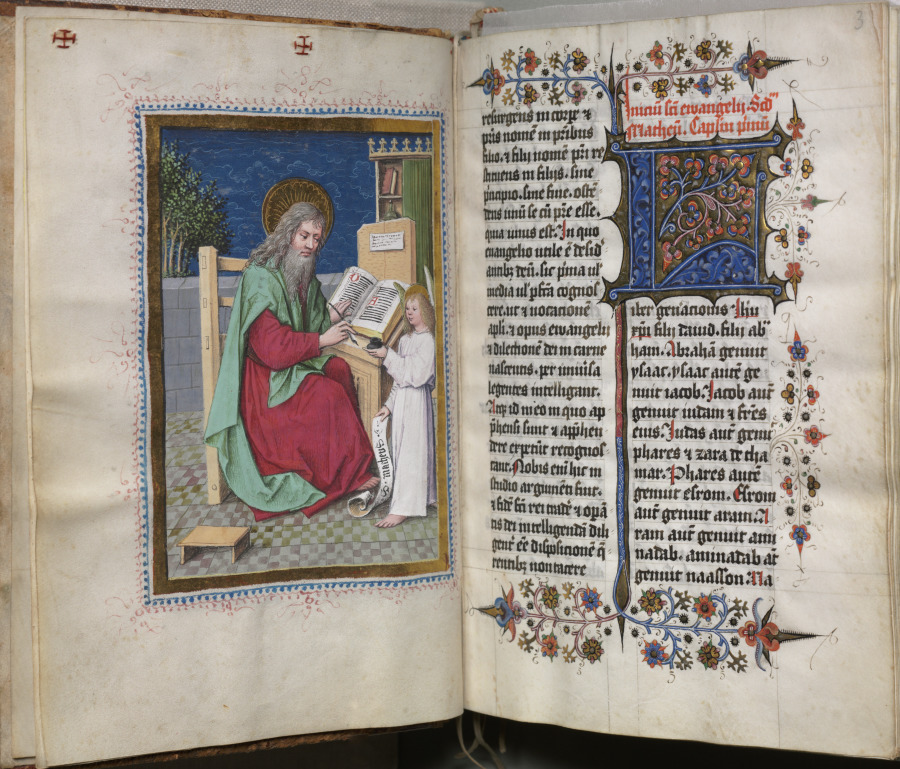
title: Gospel Book with Evangelist Portraits: Decorated Initial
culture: Germany, Middle Rhine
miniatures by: Master of the House-Book (German, c. 1470–1500)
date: c. 1480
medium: ink, tempera, and gold on vellum; original blind stamped leather binding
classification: Bound Volume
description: The four gospels are preceded by a full-page portrait miniature of the appropriate evangelist. Per tradition, they are represented as contemporary scribes surrounded by all the tools of their trade—ink pots, quill pens, and penknives. The anonymous illuminator of these miniatures, called the Hausbuch Master, is known primarily for an album of lively drawings as well as some 90 copper engravings now in Amsterdam. He was also apparently a panel painter of some distinction. The skillful pen work, tracery, and vine scrolls, as well as the large initials, are the work of other artists. The binding is original.